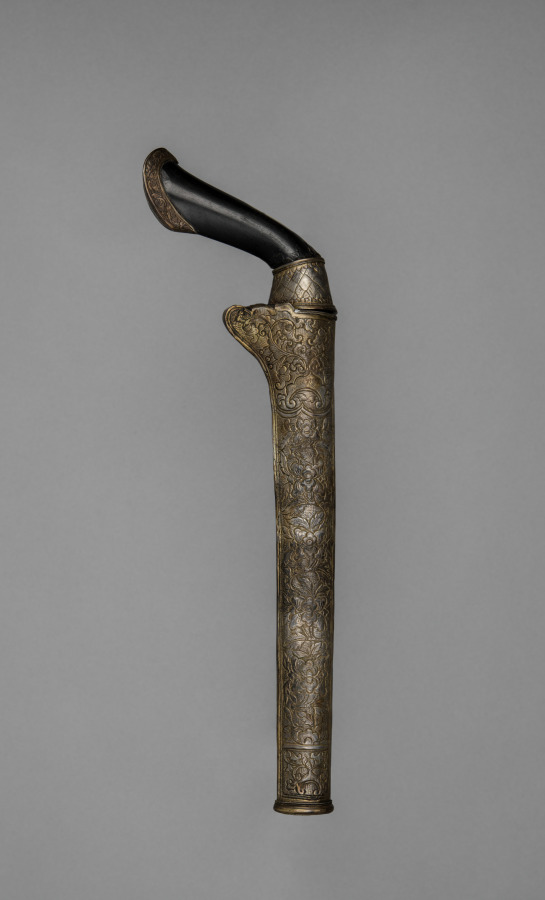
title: Knife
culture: Sumatra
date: 1500s–1800s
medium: Blade: damascened steel; handle: wood, bronze, and gilt silver fittings; scabbard: gilt silver with wood core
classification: Arms and Armor